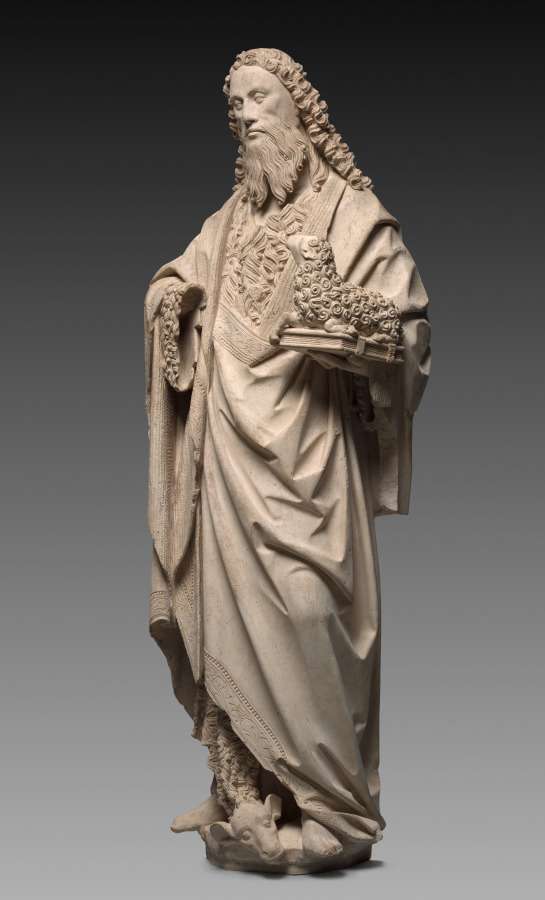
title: Saint John the Baptist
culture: French, Lorraine, Nancy or Bar-le-Duc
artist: attributed to Jan Crocq (Netherlandish, act. 1486–1510)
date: c. 1500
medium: Tonnerre limestone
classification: Sculpture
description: John the Baptist was one of the most beloved and widely venerated saints of the Middle Ages. He is depicted here wearing his traditional camel hair fleece beneath a luxuriant outer mantle. The sculpture is attributed to Jan Crocq, a Netherlandish artist active at the court of René II, Duke of Lorraine at Nancy from 1486 to 1510, and noted for his naturalistic treatment of hair and costume.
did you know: St. John the Baptist holds a book and a lamb, referencing his description of Christ as "the lamb of God."